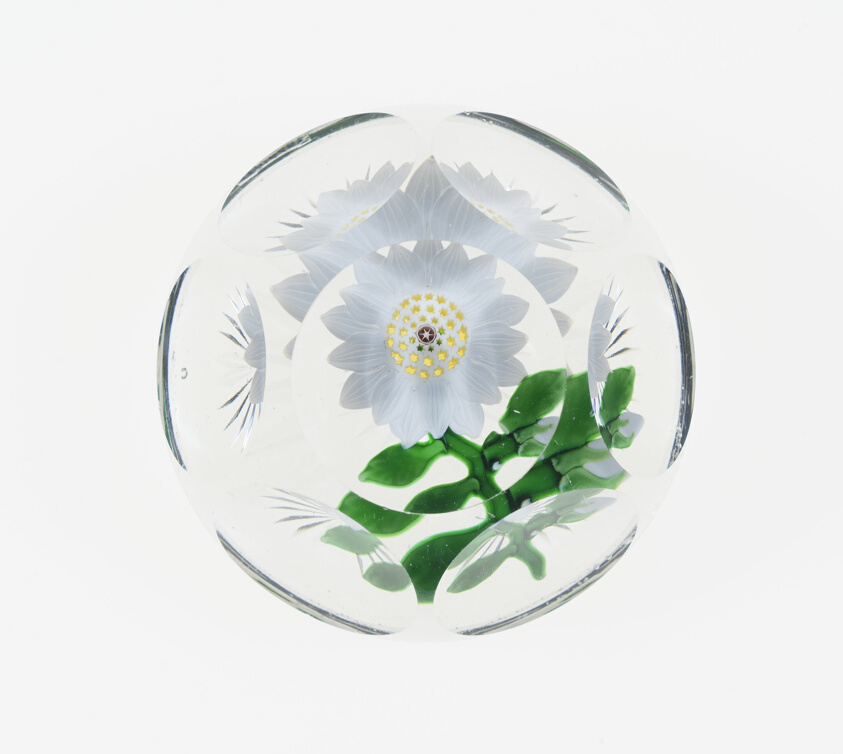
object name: Glass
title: Paperweight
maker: Baccarat Glassworks (Cristalleries de Baccarat); Lorraine, France, founded 1764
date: c. 1848–55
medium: Glass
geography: Lunéville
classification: paperweight; lampwork; european decorative arts; glass